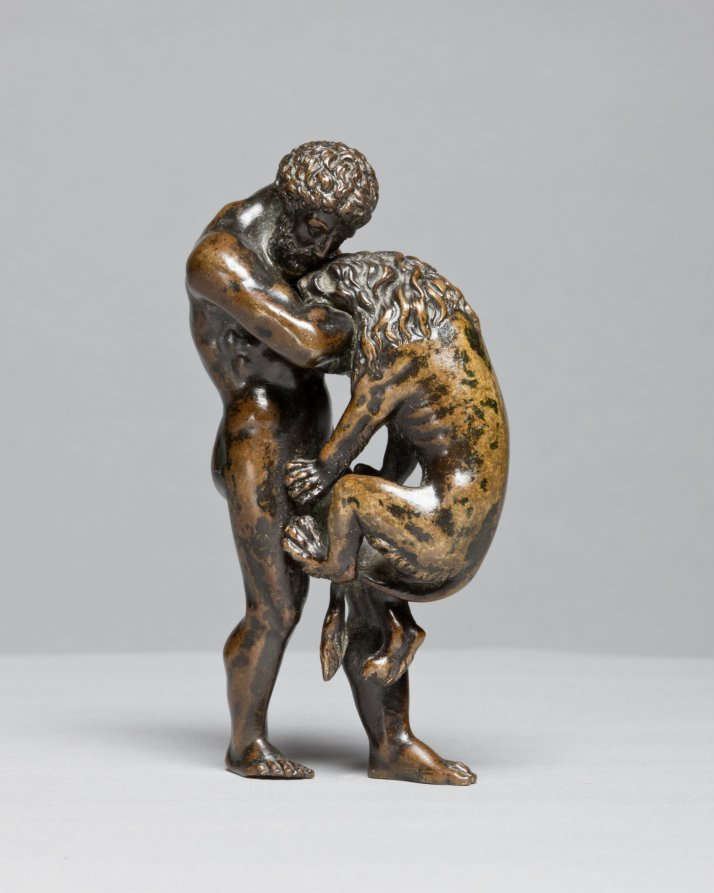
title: Hercules and the Nemean Lion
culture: Italy or France, 16th century or later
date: 1500s or later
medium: bronze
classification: Sculpture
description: The original owner of this work would have understood that this scene referred to the entire story of Hercules, the demi-god who had to accomplish twelve labors. The lion is named after the city of Nemea, near Corinth, a monstrous beast sent by the goddess Hera to wreak havoc on the area. After killing the lion, Hercules wore his pelt, commonly seen in other representations of the hero.